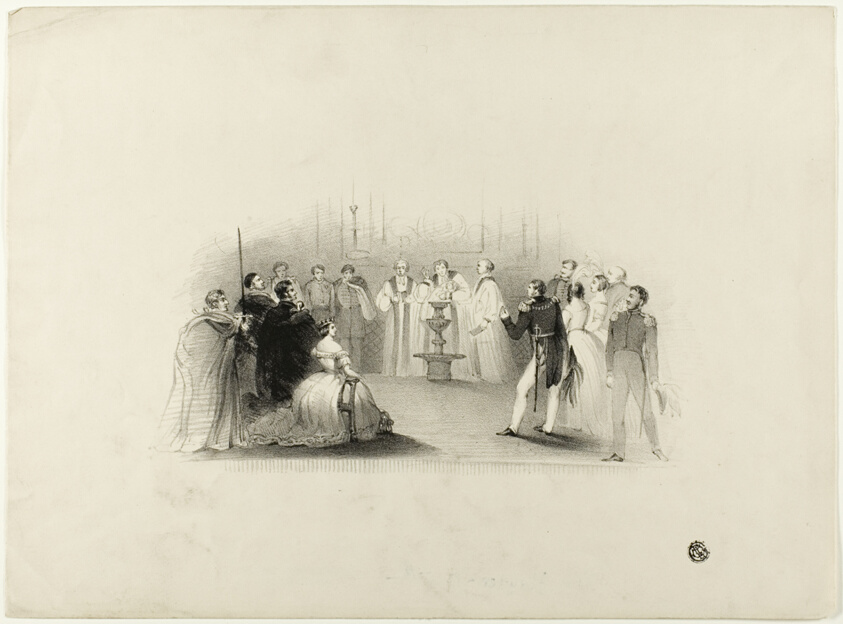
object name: Print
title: Christening of Edward VII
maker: John Hayter (English, 1800-c. 1891)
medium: Lithograph on paper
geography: England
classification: lithograph; print; prints and drawing